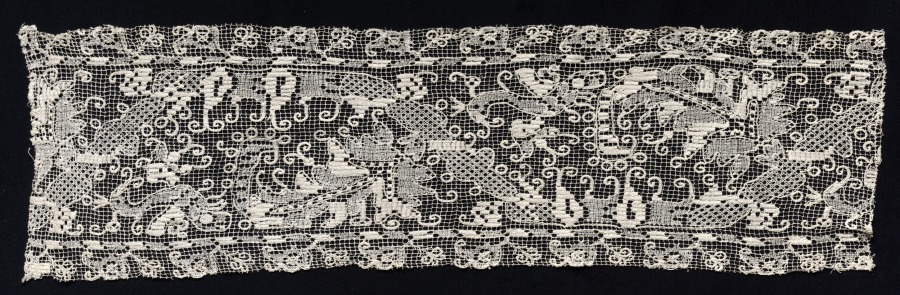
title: Band with Leaf Motifs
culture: Italy, Sardinia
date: 1600s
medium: Bleached linen (est.): needle lace, filet/lacis (knotted ground and darned in one and two directions)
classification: Lace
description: A scrolling vine with budding vegetation or a tendril motif is a recurring pattern in needle lace. The frequent use of the motif, adapted in lace from different centuries and regions, suggests that it was found in a pattern book. The maker of this piece used thread of different thicknesses to give texture and variety to the design.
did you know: Books of patterns for lace making and other needlework were aimed at well-to-do women and girls as a way of encouraging domestic virtue.